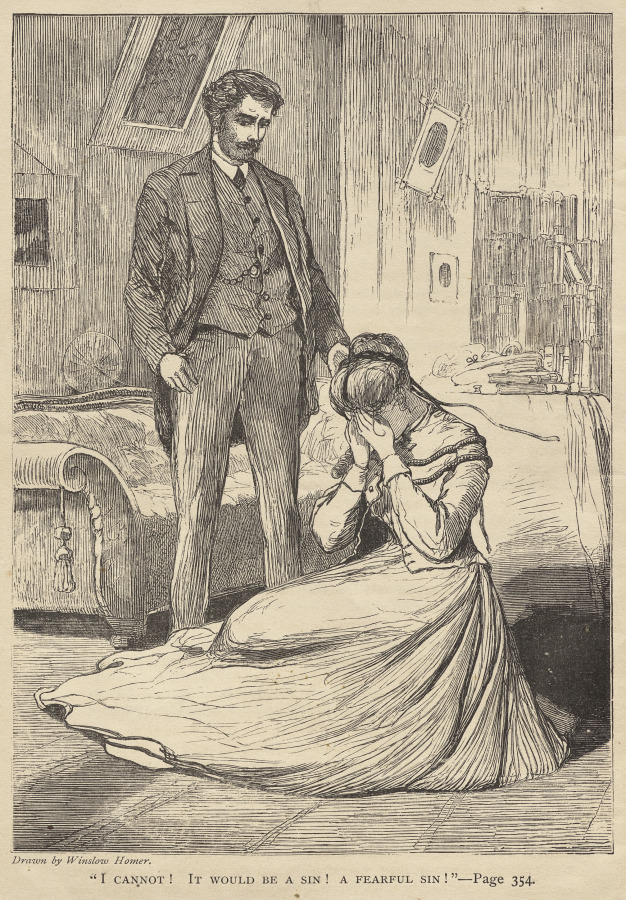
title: "I Cannot! It Would Be a Sin! A Fearful Sin!"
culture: America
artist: Winslow Homer (American, 1836–1910)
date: 1868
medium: wood engraving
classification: Print